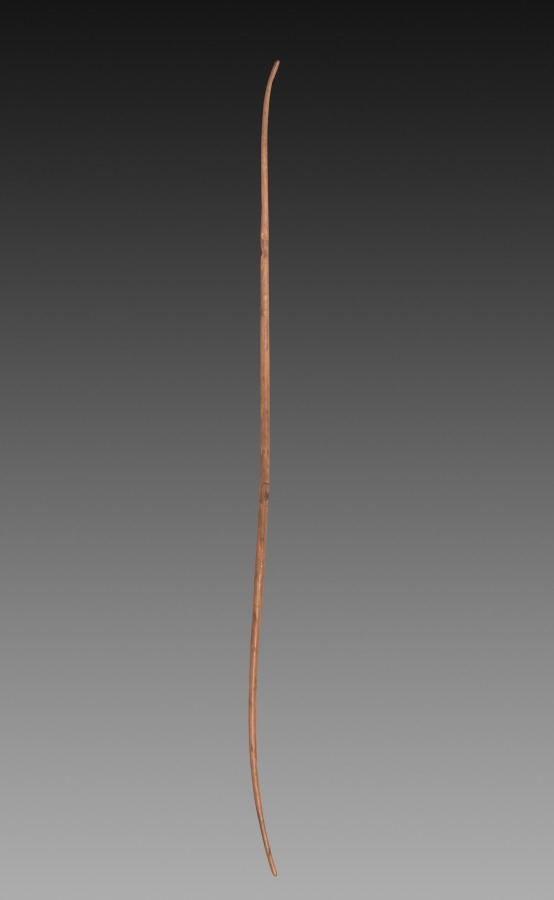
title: Wooden Bow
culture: Egypt, First Intermediate period (2123–2040 BCE), Dynasty 10–Middle Kingdom (2040–1648 BCE), Dynasty 12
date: 2123–1914 BCE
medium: wood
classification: Wood